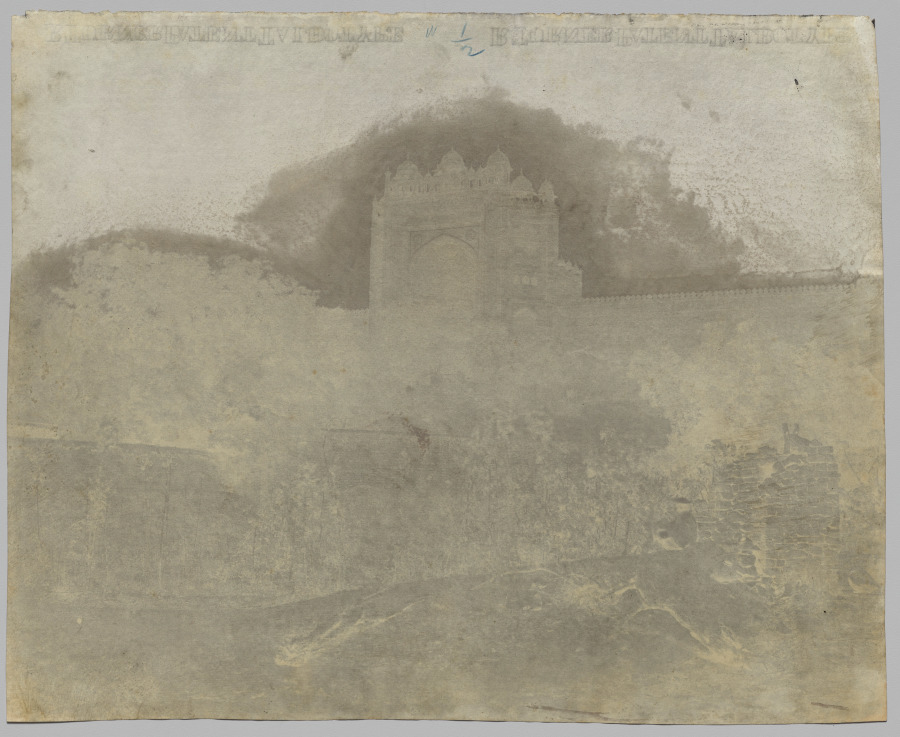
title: Buland Darwaza with Figure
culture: England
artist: Dr. John Murray (Scottish, 1809–1898)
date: 1858–62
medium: waxed paper negative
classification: Photograph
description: This gateway is the entrance to the Great Mosque at Fatehpur Sikri, not far from where John Murray was stationed for half of his four decades in India. Murray was by profession a doctor in the army of the East India Company, a British trading company that ruled much of India from 1757–1858. He took up photography in 1849 and made it his personal mission to photograph the many famous buildings in the region.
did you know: The Buland Darwaza, or “high gate,” was built in 1575 by Mughal emperor Akbar and is said to be the tallest gate in the world.